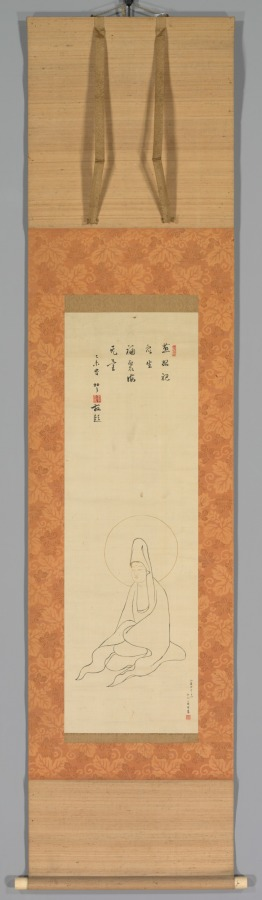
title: White-Robed Guanyin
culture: China, Yuan dynasty (1271-1368)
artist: copy after Jueji Yongzhong (Chinese, active around 1300)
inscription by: Zhongfeng Mingben (Chinese, 1263–1323)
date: late 1200s–early 1300s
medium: hanging scroll; ink and gold on silk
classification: Painting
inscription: Inscription: one of the 84,000 painted by the priest Insei.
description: The original model for this ink drawing of Guanyin, the bodhisattva of infinite compassion (Avalokiteshvara in Sanskrit), is CMA 1978.47.1. This drawing is a later copy with the same image of the White-Robed Guanyin, but in reverse. The inscription above reads: one of the 84,000 painted by the priest Insei. The inscription seems to indicate that the Japanese priest Insei repeatedly copied the image of the bodhisattva in an act of piety and to accumulate merit, as is promised in the Lotus Sutra for anyone who paints images of the Buddha, they “will achieve the Buddha path.” The priest’s name and seal need further study and identification.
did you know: The bodhisattva's face and halo were delicately painted in gold.